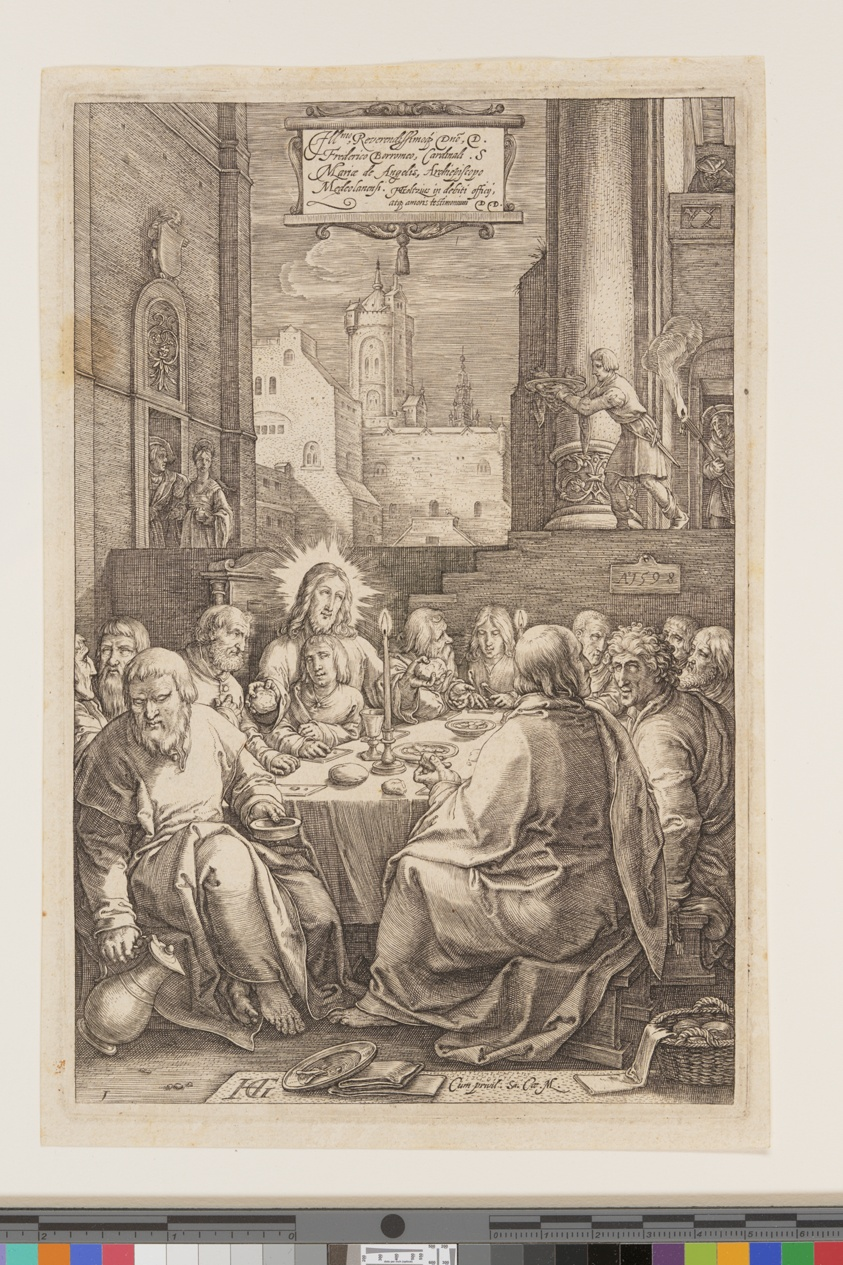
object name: Print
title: The Last Supper, from The Passion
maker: Hendrick Goltzius (Dutch, 1558–1617)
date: 1598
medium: Engraving on ivory laid paper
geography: Netherlands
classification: engraving; paper; print; prints and drawing